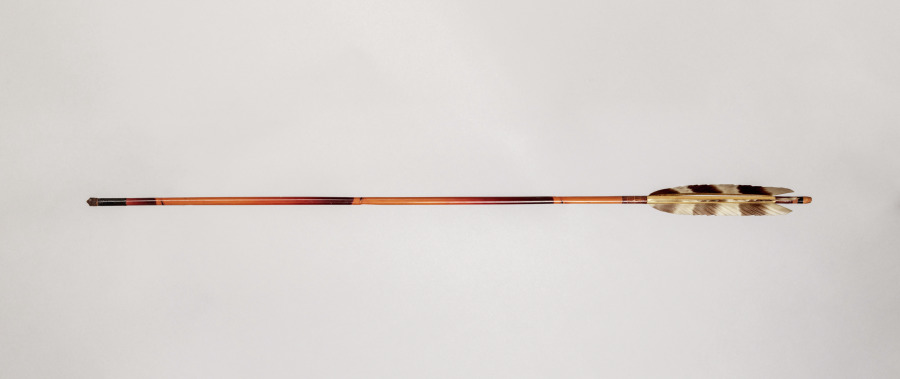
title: Arrow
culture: Japan, Edo period (1615–1868) to Meiji period (1868–1912)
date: 1800s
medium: bamboo shaft tipped with ivory point and heeled with feathers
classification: Arms and Armor